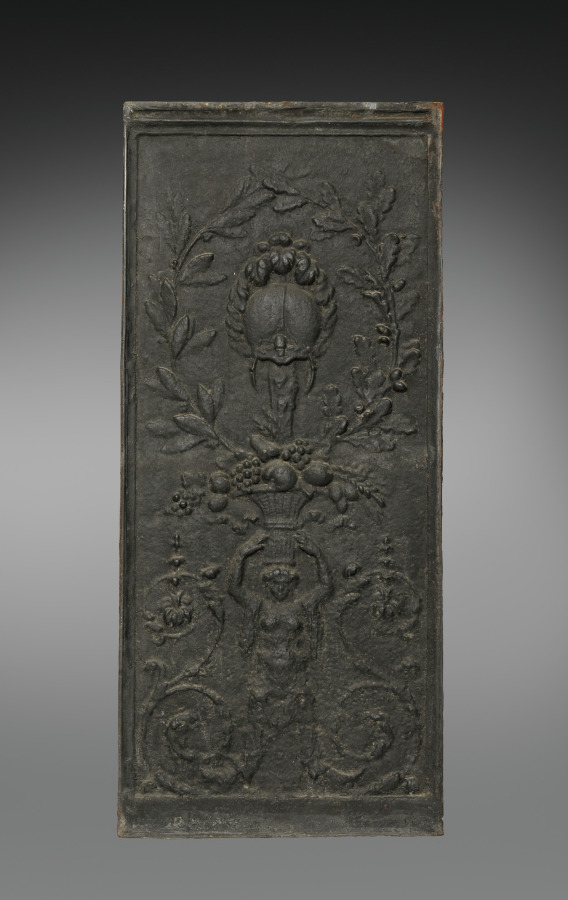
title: Set of Fire Linings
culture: France, style of Louis XVI, 18th Century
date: c. 1770–1780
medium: cast iron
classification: Furniture and woodwork